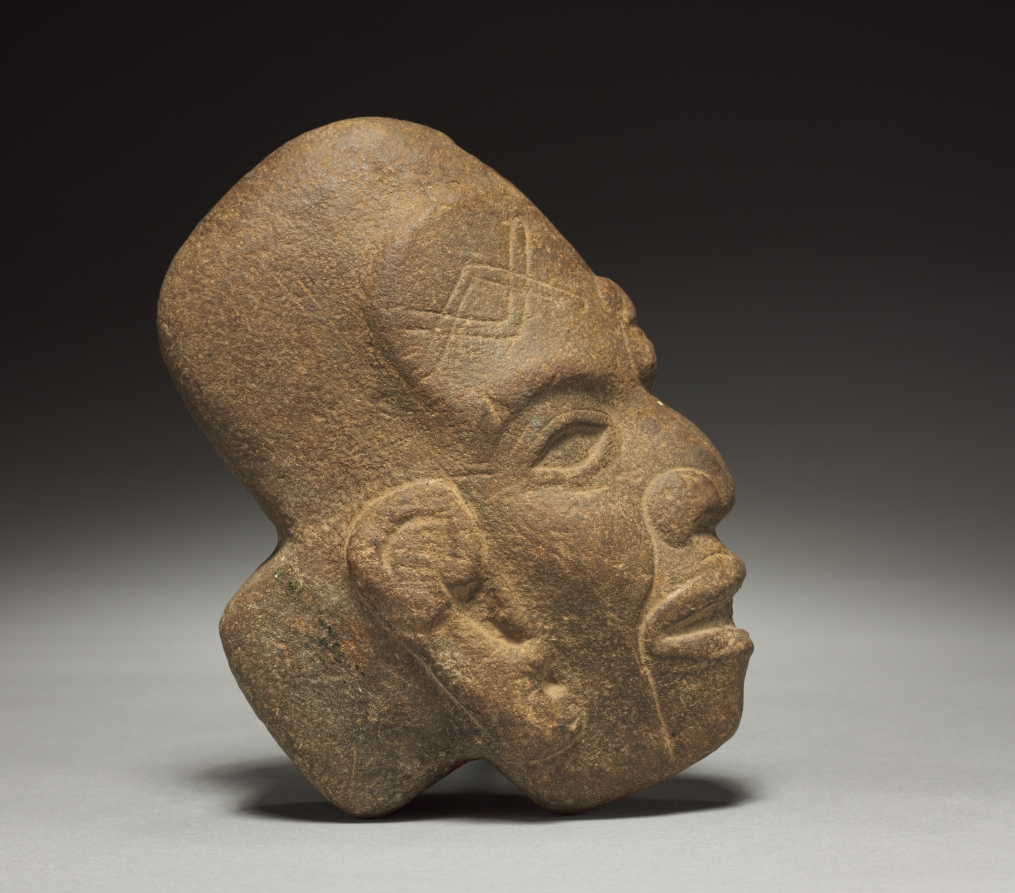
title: Ballgame Thin Stone Head (Hacha)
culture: Mesoamerica, Classic Veracruz style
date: 600–900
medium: stone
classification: Sculpture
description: This enigmatic head is associated with an ancient ballgame played both for sport and ceremonial purposes on Mexico’s Gulf Coast, in present-day Veracruz. It may represent an elite ballplayer or ballgame patron—the forehead is incised with interlaced designs similar to the so-called mat motif, a Maya symbol for rulership. Such heads are known as hachas (Spanish for “axe”) because they often taper to a thin edge at the front, giving them the appearance of axe heads.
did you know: The interlaced designs on this head’s forehead are similar to a Maya symbol for rulership.